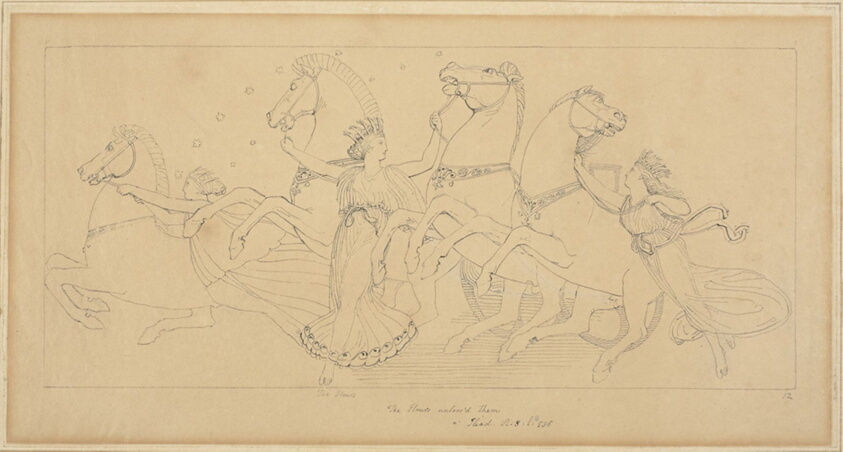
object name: Drawing and Watercolor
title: The Hours Taking the Horses from Juno's Car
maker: John Flaxman, II; English, 1755-1826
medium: Pen and black ink, over graphite, on tan wove paper, laid down on cream wove paper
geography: England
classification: pen and ink drawings; drawings (visual works); prints and drawing